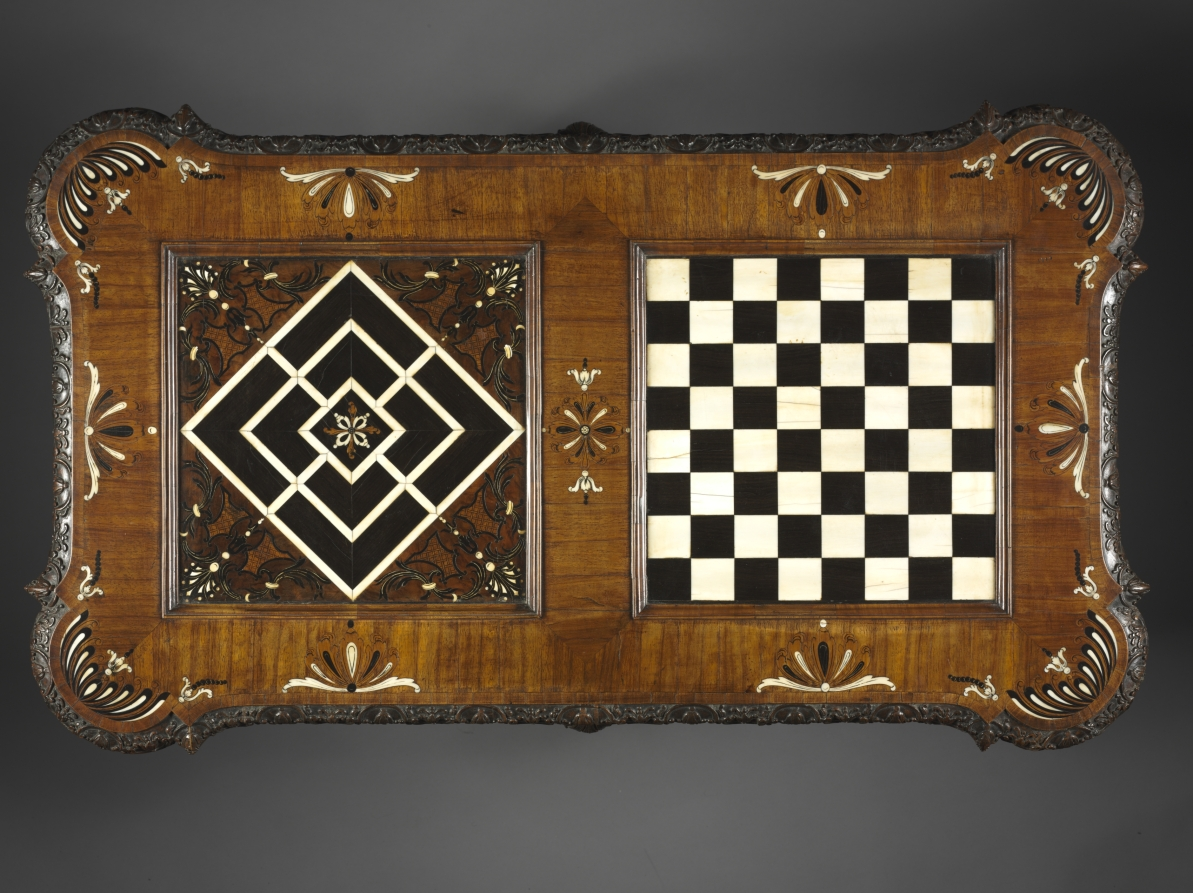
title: Gaming Table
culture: Germany, Mainz, 18th century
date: c. 1735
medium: wood and ivory marquetry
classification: Furniture and woodwork